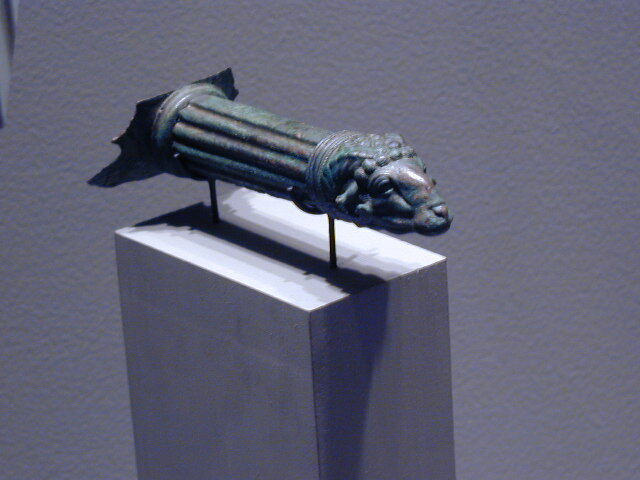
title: Patera Handle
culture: Greece, late Hellenistic period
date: 200–1 BCE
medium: bronze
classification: Metalwork